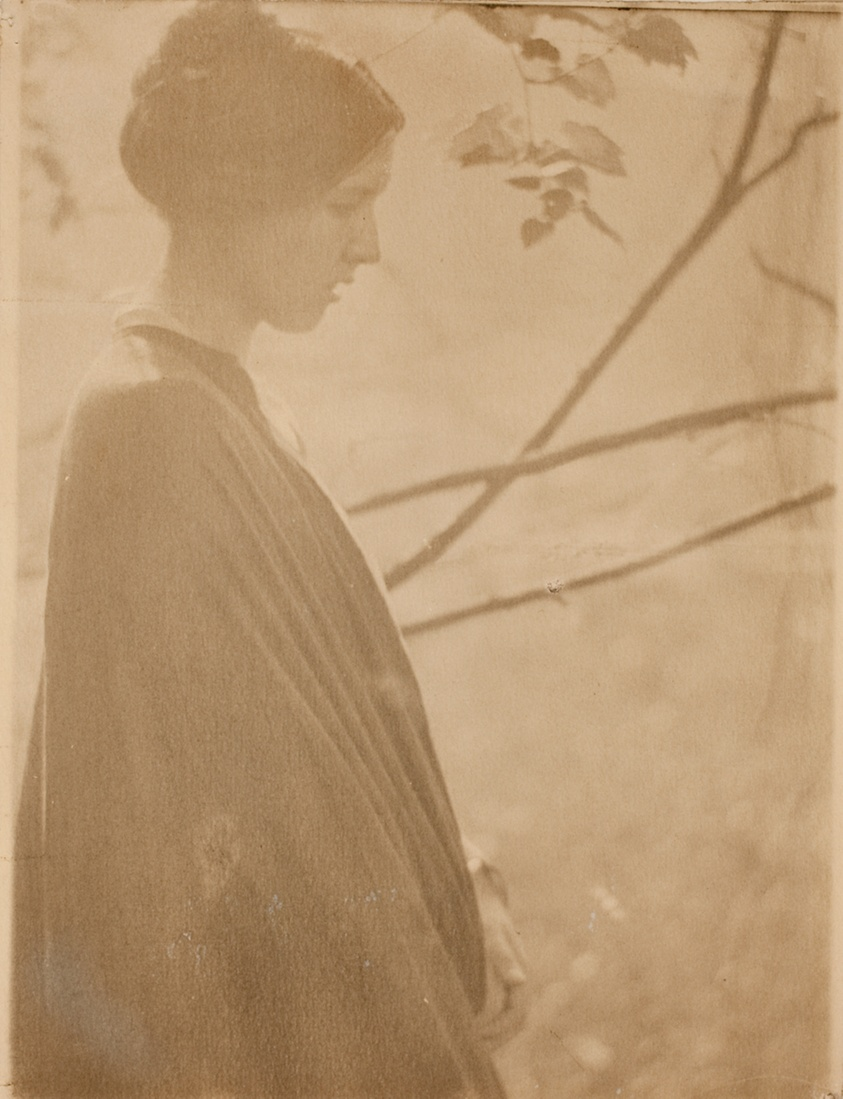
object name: Photograph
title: Sunlight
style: Pictorialism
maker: Clarence H. White (American, 1871–1925)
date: 1899, printed 1901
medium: Platinum print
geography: United States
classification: platinum print; photographic process; photography; photograph